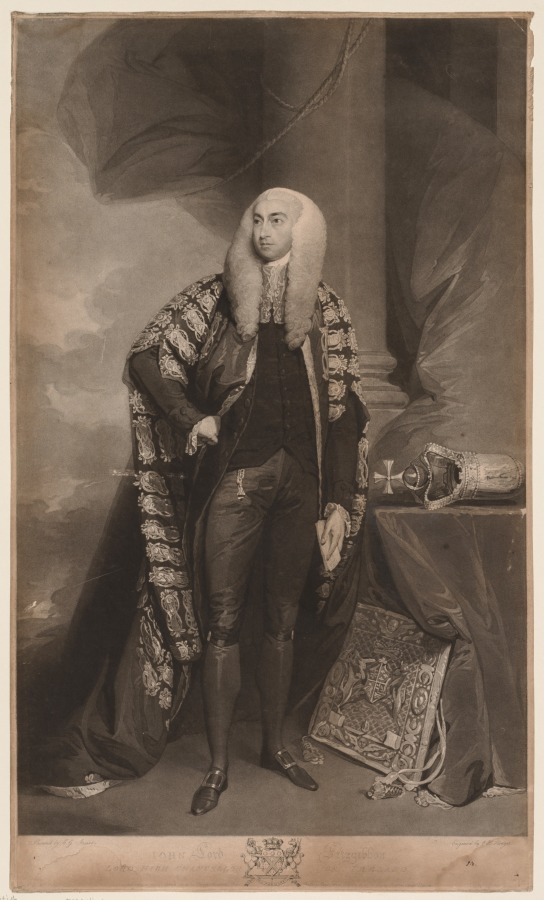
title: John, Lord FitzGibbon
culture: England, 18th-19th century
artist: Charles Howard Hodges (British, 1764–1837)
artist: after Gilbert Stuart (American, 1755–1828)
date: 1790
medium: mezzotint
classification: Print